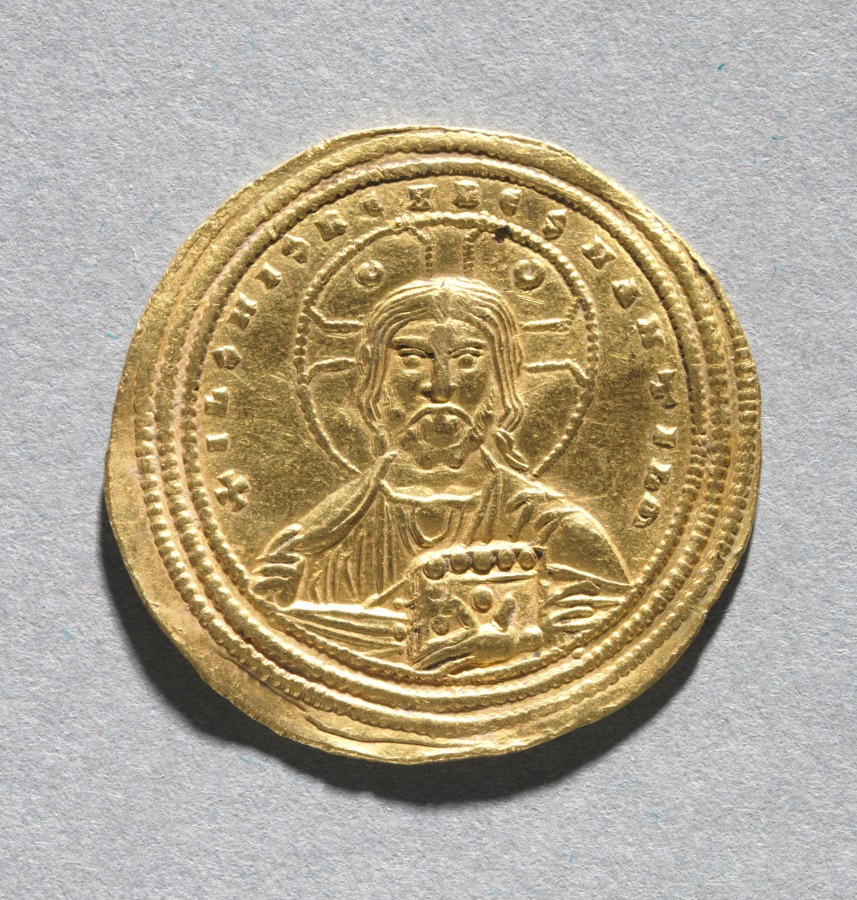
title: Nomisma with Basil II Bulgarotonos and His Brother Constantine VIII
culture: Byzantium, Constantinople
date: 977–1025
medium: gold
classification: Coins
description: The vast number of surviving Byzantine coins attests to the level of trade across the empire. Controlled and supervised by the emperor, the producers of coins took care to represent his authority and reflect his stature. Talented artists were recruited to engrave the dies (molds) used for the striking of coins. Emperors increasingly came to include their heirs and co-emperors on their coinage, as well as other family members or even earlier rulers. Coins were recognized, then as now, as small, portable works of art. With their inscriptions and images, Byzantine coins provide valuable documentation of historical events and a record of the physical appearance of the emperors. The coins shown here include the solidus, the basic gold coin of 24 karats; the tremissis, a gold coin of one-third the weight and value of the solidus; and the nomisma, which in the 10th century replaced the solidus as the standard gold coin.